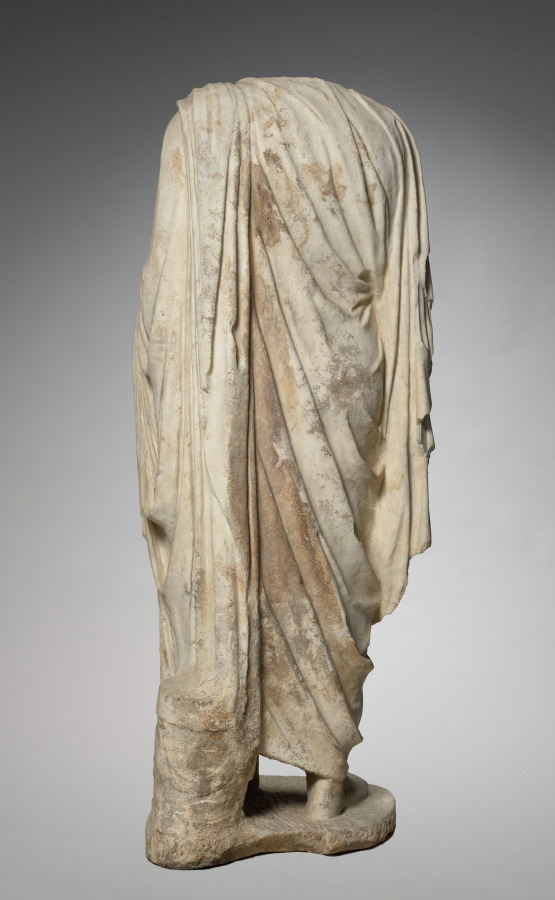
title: Togatus Figure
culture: Italy, Roman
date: 1–200 CE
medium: pentelic marble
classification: Sculpture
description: From 1929 until 1973, this toga-clad body was displayed with a portrait head of Vespasian (recarved from Nero) that did not originally belong to it. Several details indicate a mismatch: the surfaces and proportions differ, and the head projected awkwardly forward even after modern recarving of the neck to fit into the body cavity. Aspects of the toga also suggest that it was sculpted later than the head.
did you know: This body once included a separately made head and arms.